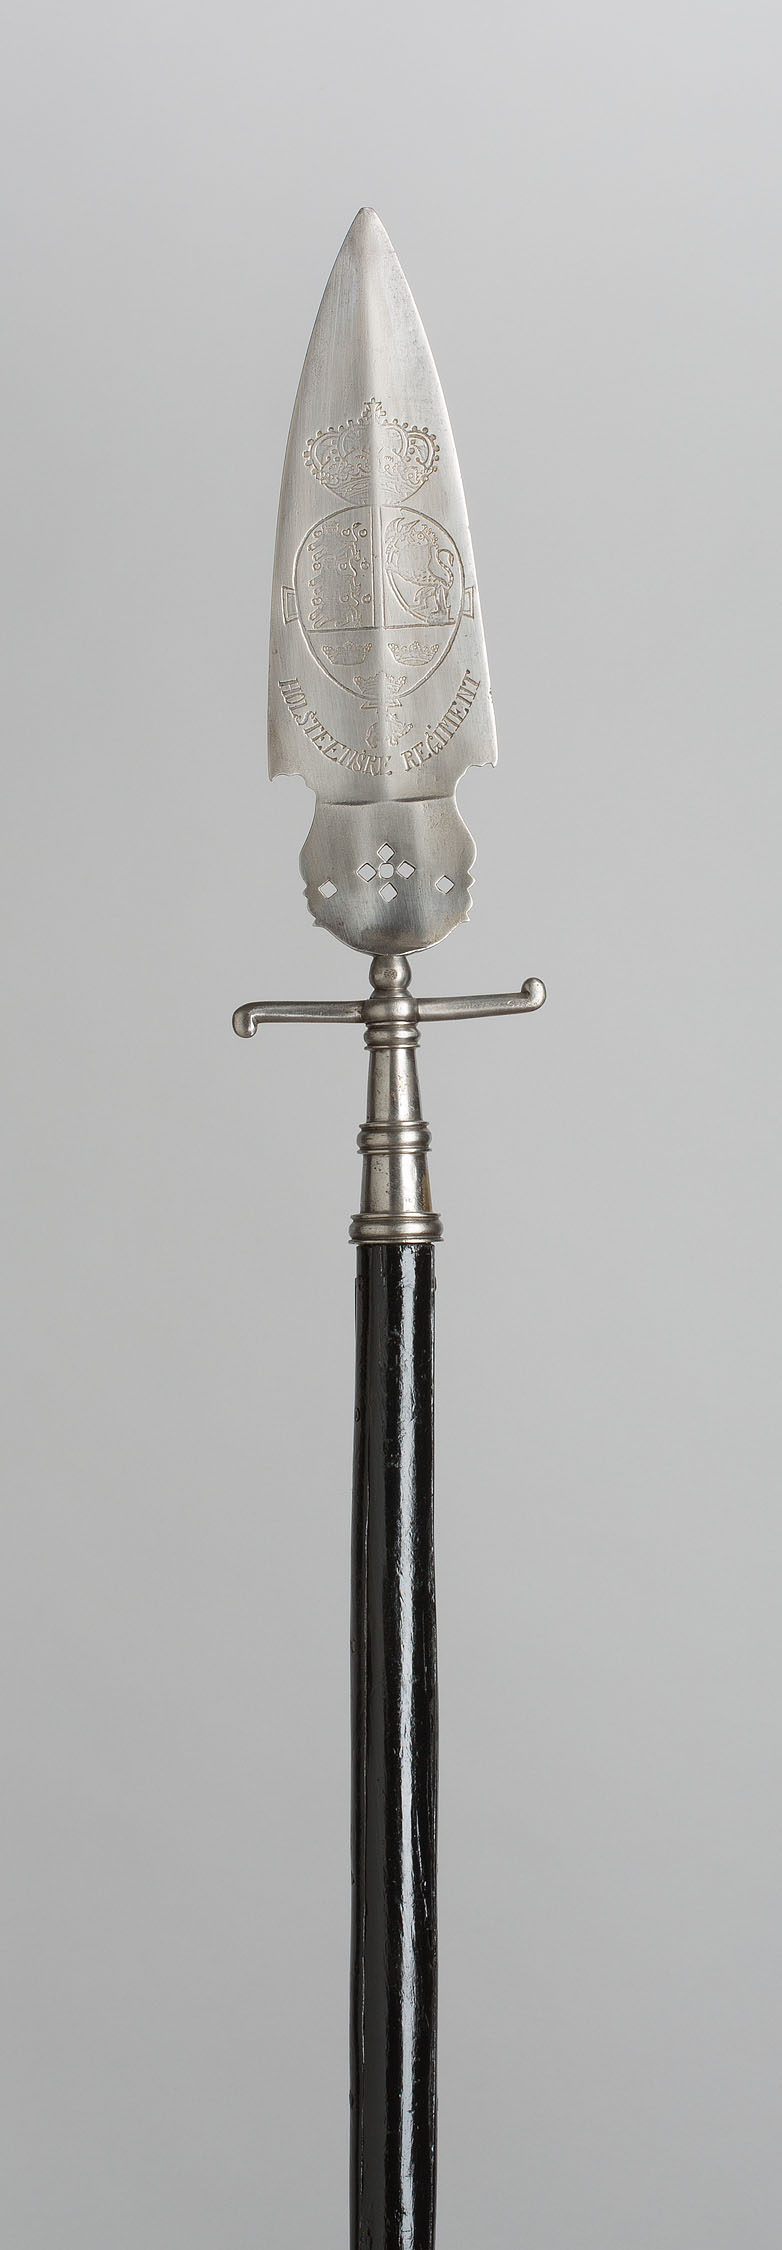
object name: Arms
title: Spontoon of the Holstein Regtiment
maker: Swedish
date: 1700/1800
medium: Steel and wood (ash)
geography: Sweden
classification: edged weapon-staff; arms; arms and armor